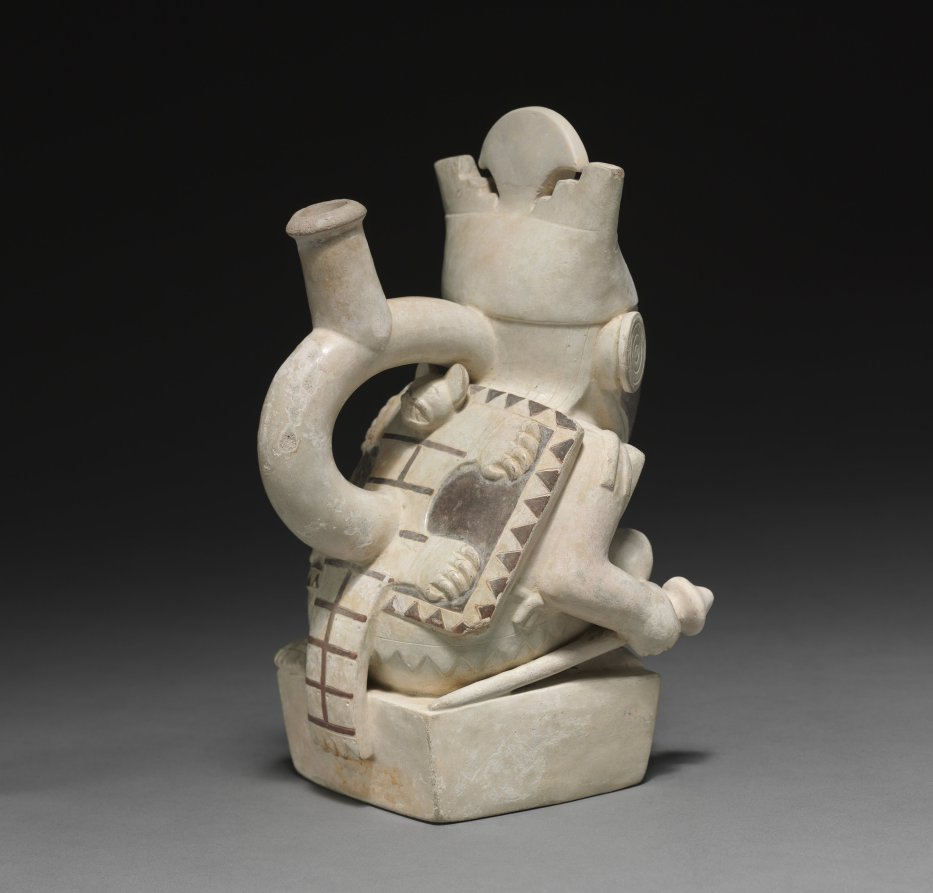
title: Warrior Vessel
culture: Peru, North Coast, Moche, Moche style (50-800)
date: c. 50–200 CE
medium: earthenware with colored slips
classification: Ceramic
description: This vessel's exquisite, crisp detail rewards careful viewing. The modeling of the feline pelt on the back is especially delicate and sharp, and each of the squares on the tunic carries a tiny dot in the upper corners, as though the squares represent plates of metal or shell attached to fabric. The face is decorated with paint or tattooing, and the headdress supports a curved, blade-shaped form.